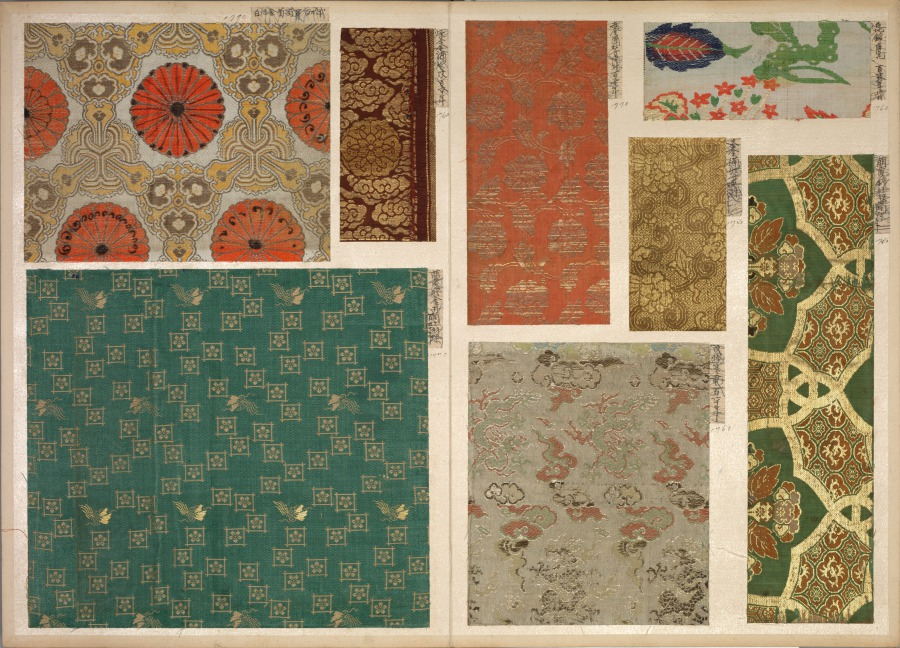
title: Album of Textile Samples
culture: Japan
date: 1790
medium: silk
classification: Textile